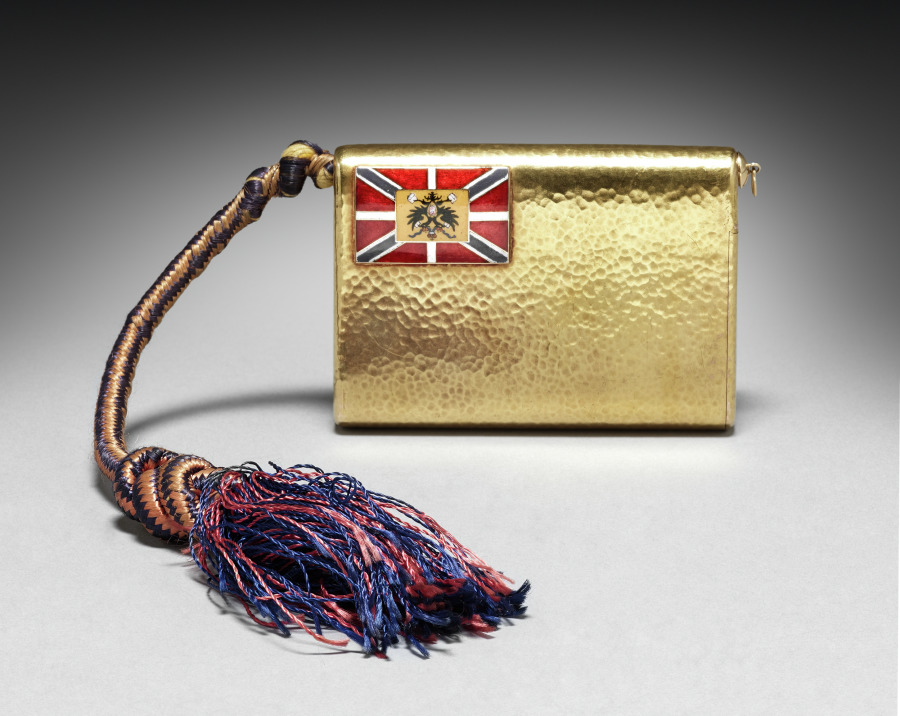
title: Cigarette Case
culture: Russia, St. Petersburg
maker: attributed to House of Fabergé (Russian, 1842–1918)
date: 1886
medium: gold, enamel, diamonds, silk cord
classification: Miscellaneous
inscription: inscribed: In Rembrance/from Sandro/Sevastopol/1886/6 May in Cyrillic script.